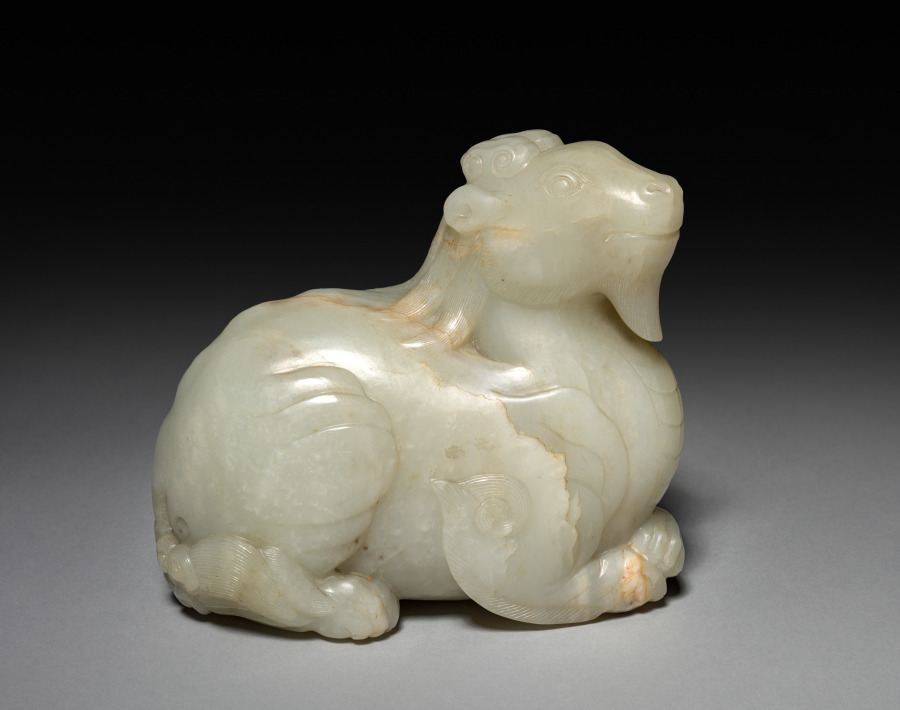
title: Fantastic Animal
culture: China, Qing dynasty (1644-1911)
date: 1700s–1800s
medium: jade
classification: Jade